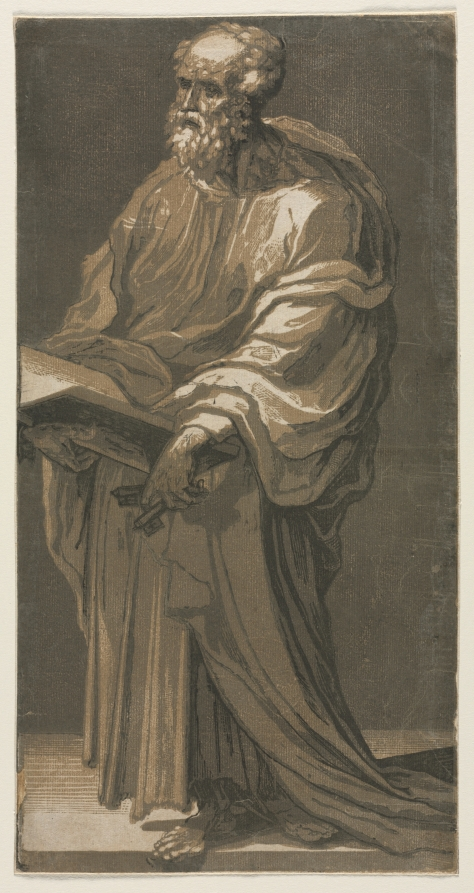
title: Saint Peter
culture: Italy, 16th century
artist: Domenico Beccafumi (Italian, 1486–1551)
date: c. 1547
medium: chiaroscuro woodcut printed in four shades of brown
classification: Print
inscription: Watermark: Flowering Fleur de Lys in a Circle Surmonted by a Star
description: Beccafumi was an important and extremely versatile Sienese artist––a painter of altarpieces, frescoes, and furniture, a sculptor in wood, stucco, and bronze, and a designer of a large portion of the inlaid marble floor in the Siena Cathedral. He was also one of the most imaginative, daring, and versatile printmakers of the Italian Renaissance. Although his first prints were engravings, in order to reproduce the rich, tonal effects of his drawings, Beccafumi began to make chiaroscuro woodcuts. Around 1547, he completed a series of six chiaroscuros of the apostles, including Saint Peter. These are the artist's most skillful, complex, and successful prints, and among the most extraordinary color prints in 16th-century Italy. The blocks were carved and printed in an innovative manner. In order to attain the brilliant highlights common in his chiaroscuro drawings, Beccafumi created the effect of thin white hatching lines on a dark ground. He also treated each impression as a separate work of art.